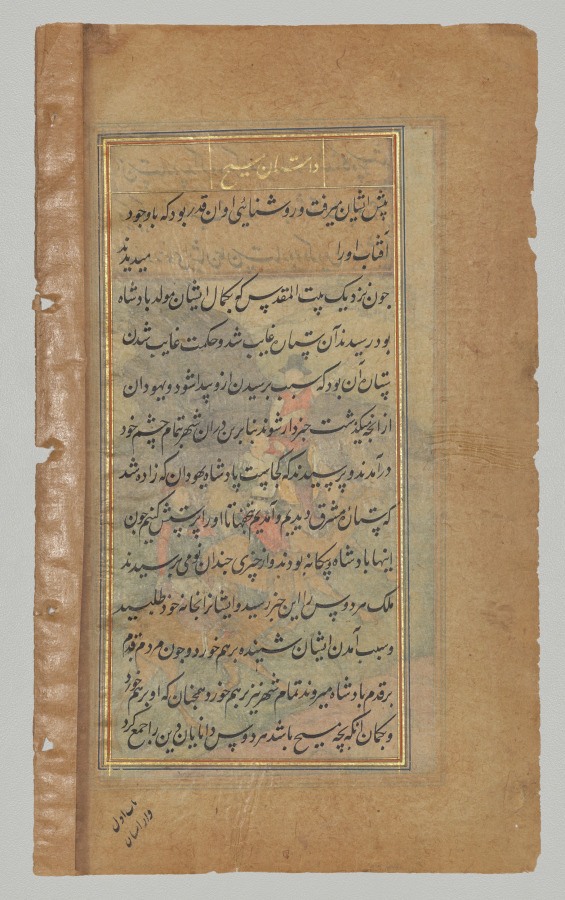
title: The Magi Follow the Star (folio 34 recto), from a Mirror of Holiness (Mir’at al-quds) of Father Jerome Xavier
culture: Mughal India, Allahabad, made for Prince Salim (1569–1627)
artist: attributed to Payag (Indian)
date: 1602–4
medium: Gum tempera, ink, and gold on paper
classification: Manuscript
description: One of the three kings points excitedly at the star at the upper left edge of the page, while another bites the finger of astonishment; the third holds his fist over his heart. They are all dressed like Portuguese merchants, but they ride camels associated with their homeland in Arabia, as specified in the text. The Westerners whom Mughals would have seen, besides priests, were mainly merchants from the Portuguese port of Goa on India’s western coast. They regularly visited Akbar to negotiate trade agreements, so they served as the primary visual model for all nonclerical Europeans. The artists who produced this manuscript worked for Akbar before joining Prince Salim at his rebel court in Allahabad.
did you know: At the breakaway court of Prince Salim in Allahabad, high-quality materials were not as plentiful as in the imperial capital. The paper is brittle and has browned excessively, and the paint films are relatively thin; here the text from the verso shows through the lightly colored background.